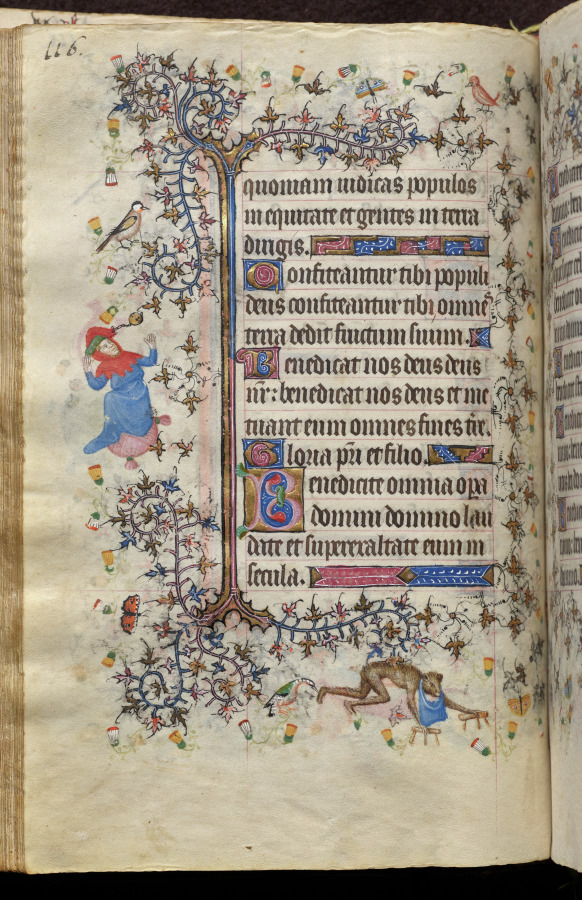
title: Hours of Charles the Noble, King of Navarre (1361-1425): fol. 58v, Text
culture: France, Paris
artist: Master of the Brussels Initials and Associates (French)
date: c. 1405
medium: ink, tempera, and gold on vellum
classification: Bound Volume